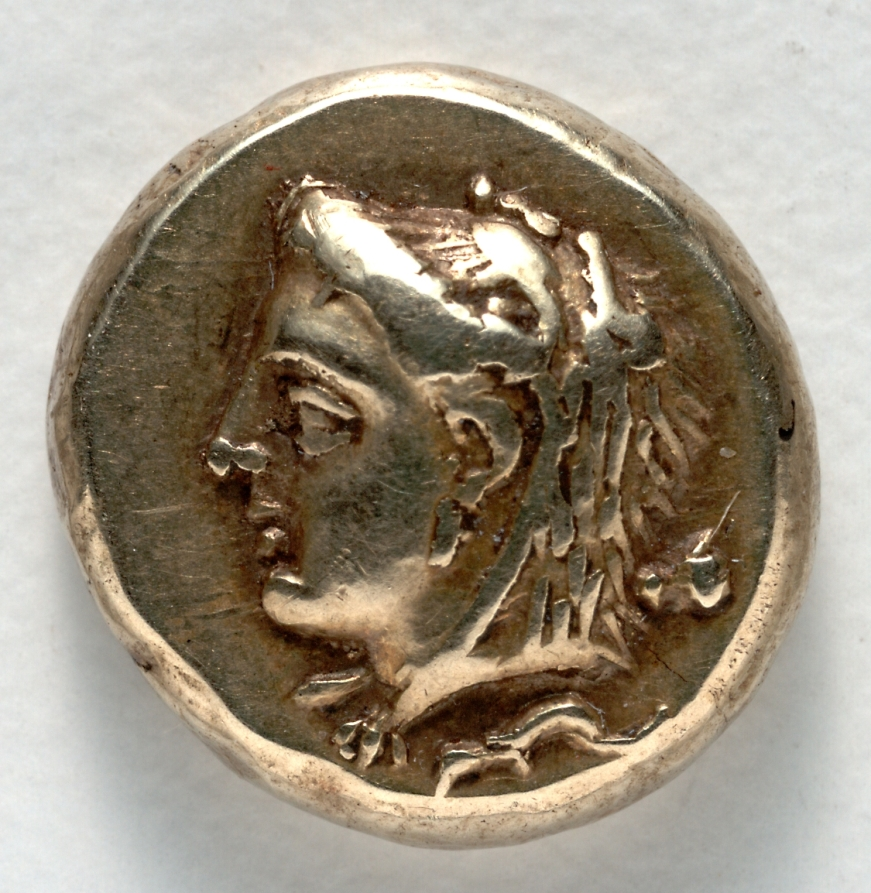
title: Hecte: Head of Omphale (obverse)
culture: Greek, minted at Phokaia (Ionia)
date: 387–326 BCE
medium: electrum (gold-silver alloy)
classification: Coins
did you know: The Lydian queen Omphale wears the lion skin of Herakles, whom she enslaved.